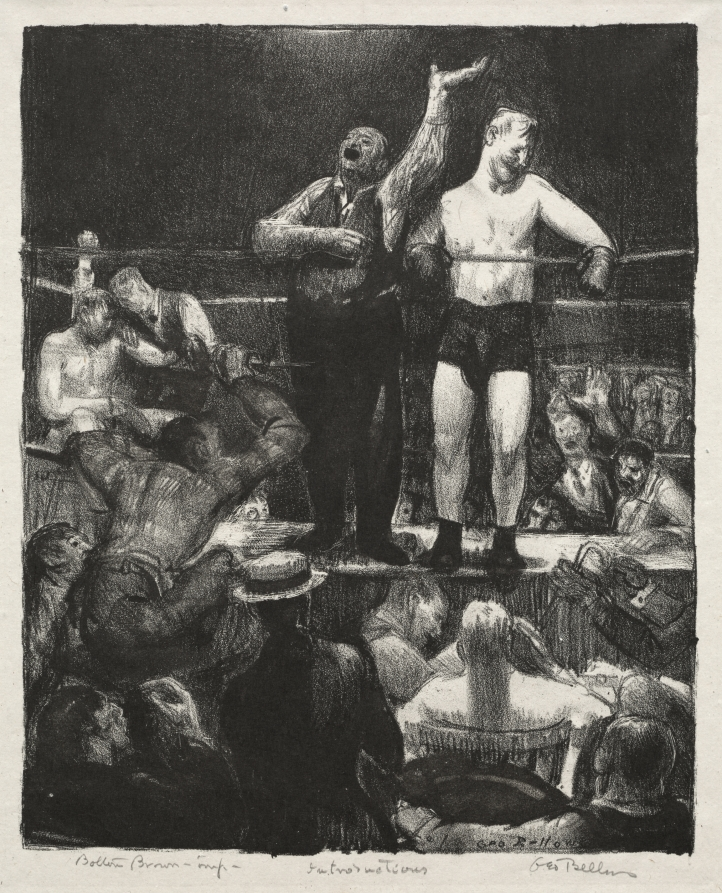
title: Introductions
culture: America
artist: George Bellows (American, 1882–1925)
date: 1921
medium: lithograph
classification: Print